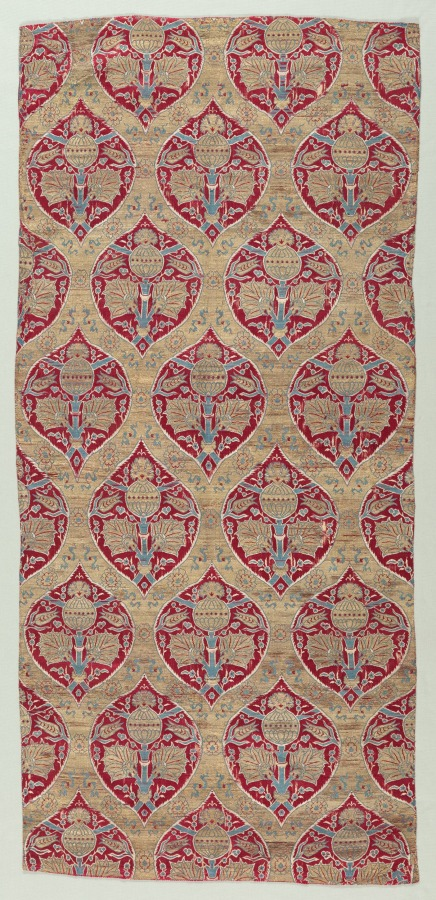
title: Ogival lattice with horizontal design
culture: Turkey, Bursa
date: 1600–1650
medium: Silk and gilt-metal thread: lampas weave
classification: Textile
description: There is a pomegranate design in each ogee (pointed arch) of this silk brocade fragment. The pomegranate is a small tree originating in Persia (today’s Iran) bearing fruit of deep red flesh filled with hundreds of seeds. The pomegranate has been revered as a symbol for health and fertility by many civilizations. In Islam the pomegranate is associated with paradise as described in the Qur’an.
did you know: There is a pomegranate design in each ogee.